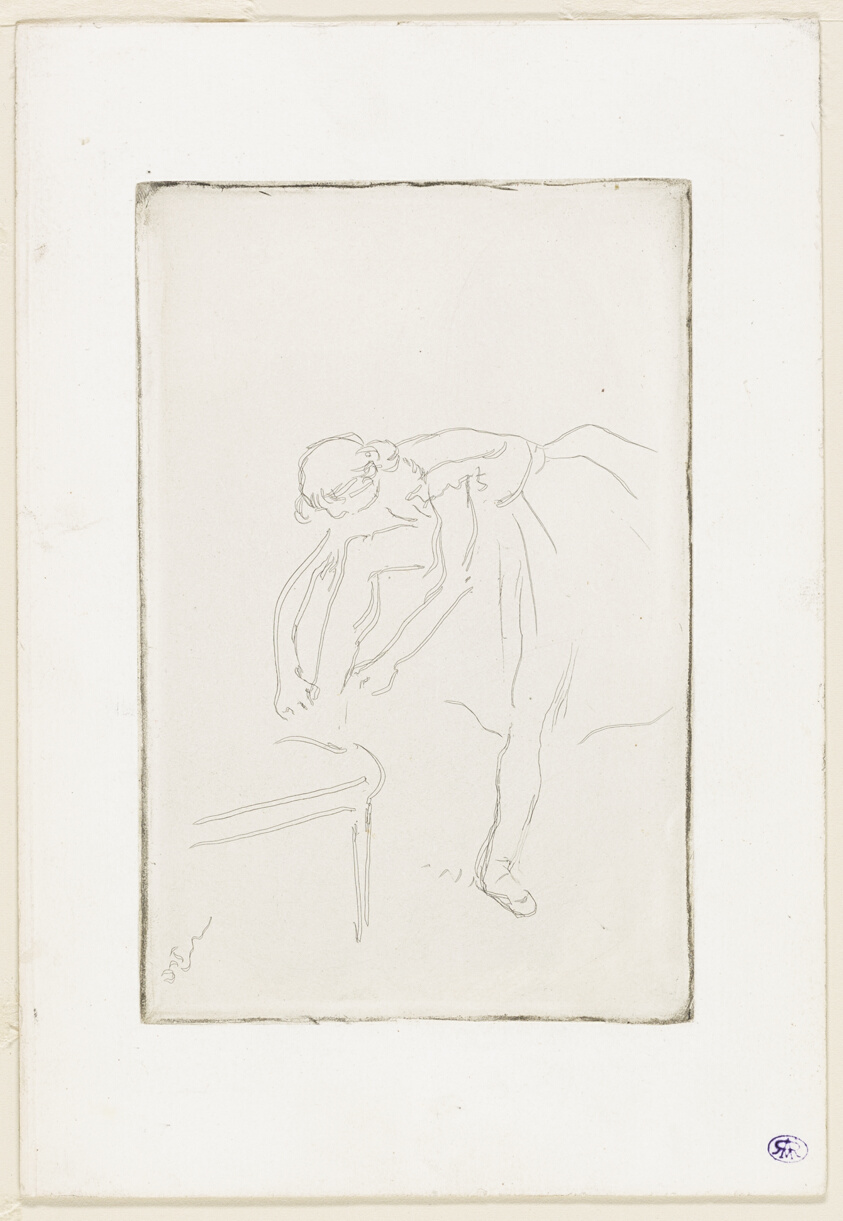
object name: Print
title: Dancer Putting on Her Shoe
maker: Edgar Degas; French, 1834-1917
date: c. 1888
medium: Etching on ivory wove paper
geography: France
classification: etching; print; prints and drawing; paper